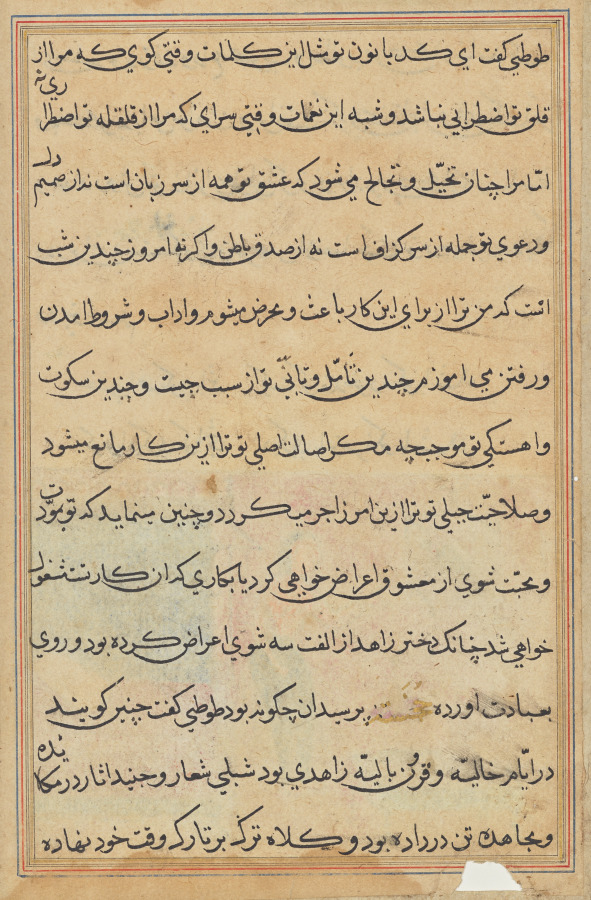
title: Page from Tales of a Parrot (Tuti-nama): text page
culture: Mughal India, court of Akbar (reigned 1556–1605)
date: c. 1560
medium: gum tempera, ink, and gold on paper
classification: Painting